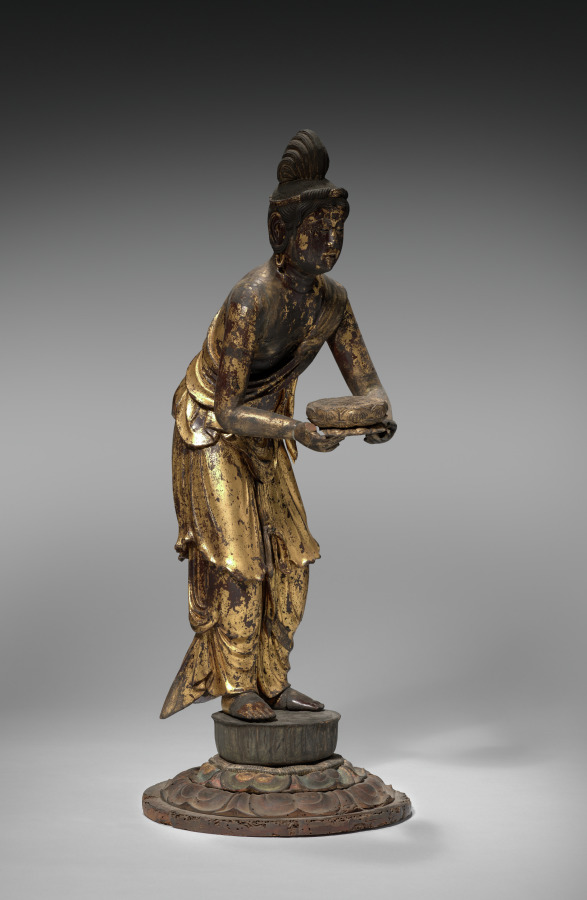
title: Kannon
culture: Japan, Kamakura period (1185–1333)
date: early 1200s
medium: wood with lacquer and gold leaf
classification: Sculpture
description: Kannon, the bodhisattva of compassion, is one of the two bodhisattvas attending Amida, the Buddha of the Western Paradise. The sculpture stands on a lotus pedestal, holding a lotus dais on which the soul of the faithful is received into paradise. The use of gold was prevalent in Buddhist art during this time—it was believed that the yellow light permeated the regions of the Amida—and Amida worship prevailed throughout Japan.